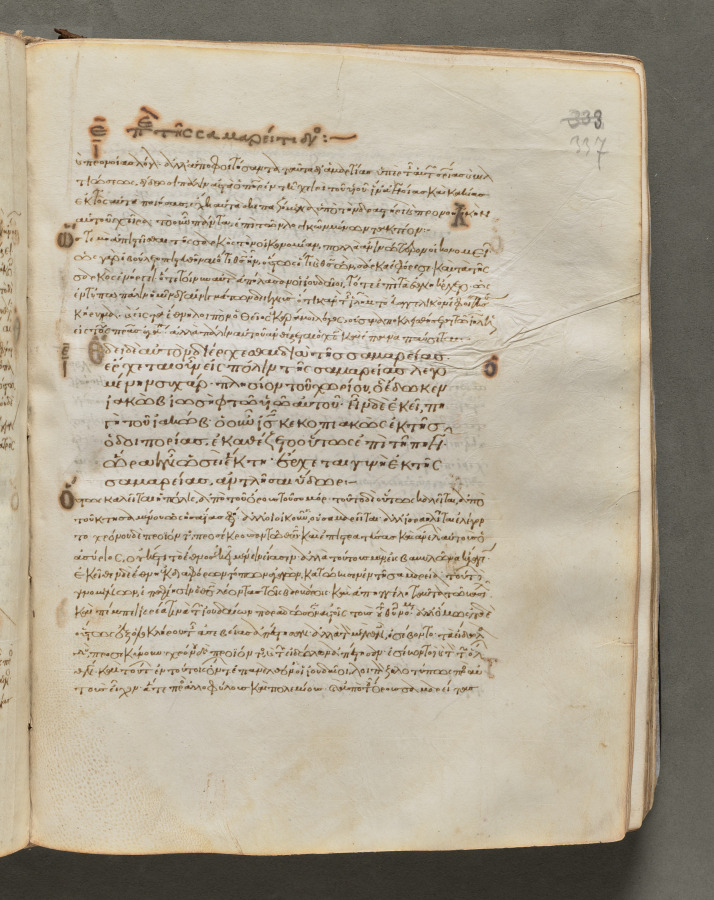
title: Text, folio 337 (recto), from a Gospel Book with Commentaries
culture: Byzantium, Constantinople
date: c. 1000–1100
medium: ink, tempera, and gold on vellum; leather binding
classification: Bound Volume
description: Each of the four gospels in this book opens on a page with brilliantly illuminated borders depicting the author of the text as well as birds—principally peacocks, symbols of the immortality of the soul—and fountains, representing the fountain of life and the salvation of the soul. This volume consists of 428 leaves with texts in Greek. Its level of sophistication suggests that it was probably written and decorated in a monastery in Constantinople.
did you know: Gospel books were carried in procession through Byzantine churches.